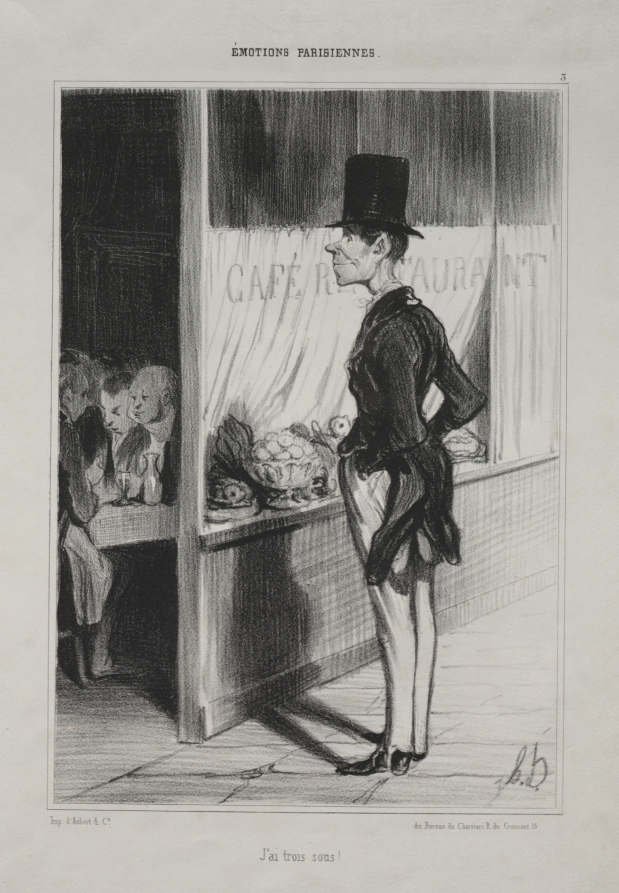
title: I Have Three Sous!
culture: France, 19th century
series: Parisian Emotions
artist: Honoré Daumier (French, 1808–1879)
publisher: Aubert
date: 1839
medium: lithograph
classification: Print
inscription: Above image, printed: ÉMOTIONS PARISIENNES. / 3 ; Below image, printed: J'ai trois sous!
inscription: Upper margin, pencil: HD 1631 ; lower margin, printed: Imp. d'Aubert & Cie. / Au Bureau du Charivari, R. du Croissant, 16 ; Verso, pencil: TR 1080/12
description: This print was published in Le Charivari (August 11, 1839) as plate 3 from the series Parisian Emotions.